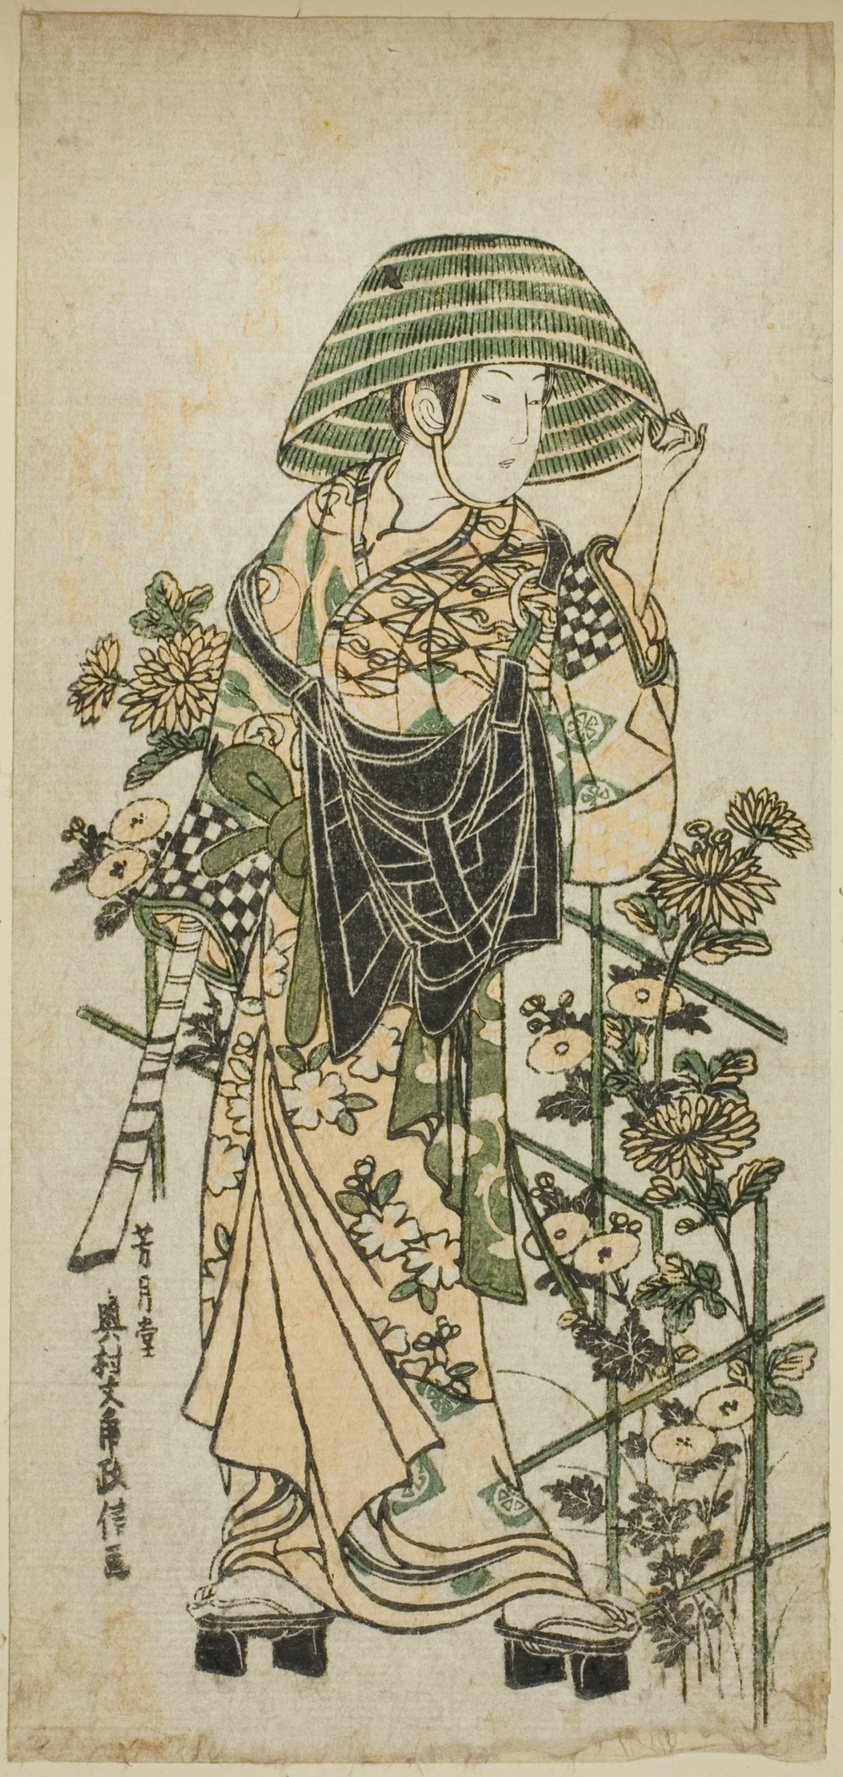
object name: Print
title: Young Man Dressed as Mendicant Monk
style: Japanese (culture or style)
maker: Okumura Masanobu (Japanese, 1686-1764)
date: c. 1755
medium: Color woodblock print; hosoban, benizuri-e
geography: Japan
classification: woodblock print; print; asian art